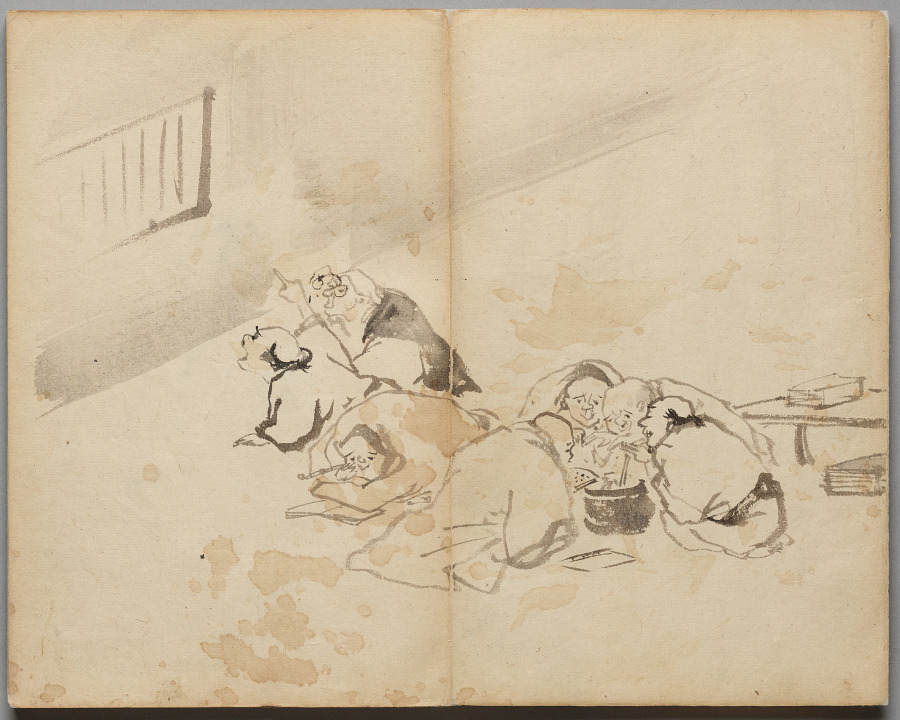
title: People Dining and Reading from Sketch Album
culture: Japan, Edo period (1615–1868) to Meiji period (1868–1912)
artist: Kawanabe Kyōsai (Japanese, 1831–1889)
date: mid- to late 1800s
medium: Accordion-style book of 26 double-leaves; ink and color on paper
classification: Bound Volume